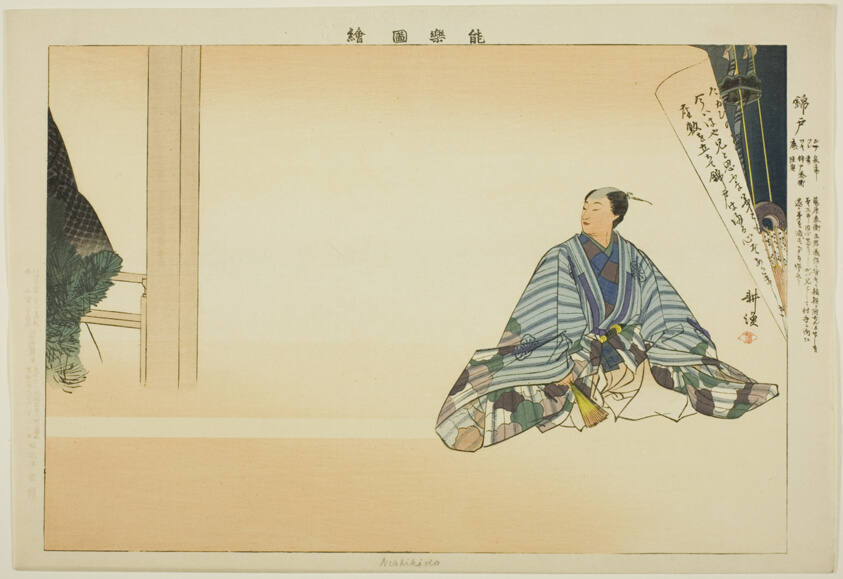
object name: Print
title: Nishikido, from the series "Pictures of No Performances (Nogaku Zue)"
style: Japanese (culture or style)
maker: Tsukioka Kogyo; Japanese, 1869-1927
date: 1898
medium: Color woodblock print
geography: Japan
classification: woodblock print; print; asian art